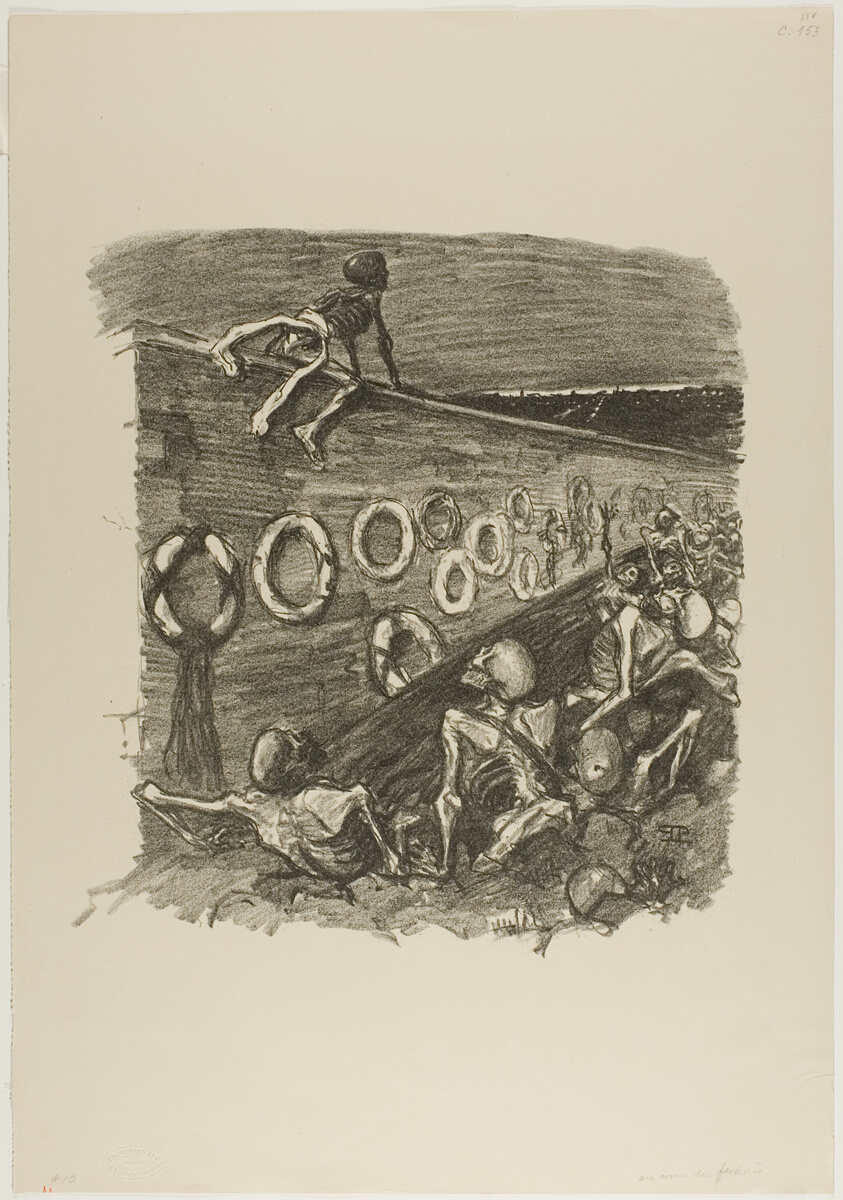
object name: Print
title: At the Wall of the Federationists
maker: Théophile-Alexandre Steinlen; French, born Switzerland, 1859-1923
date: June 1894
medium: Lithograph in black on cream wove paper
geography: France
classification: lithograph; print; prints and drawing